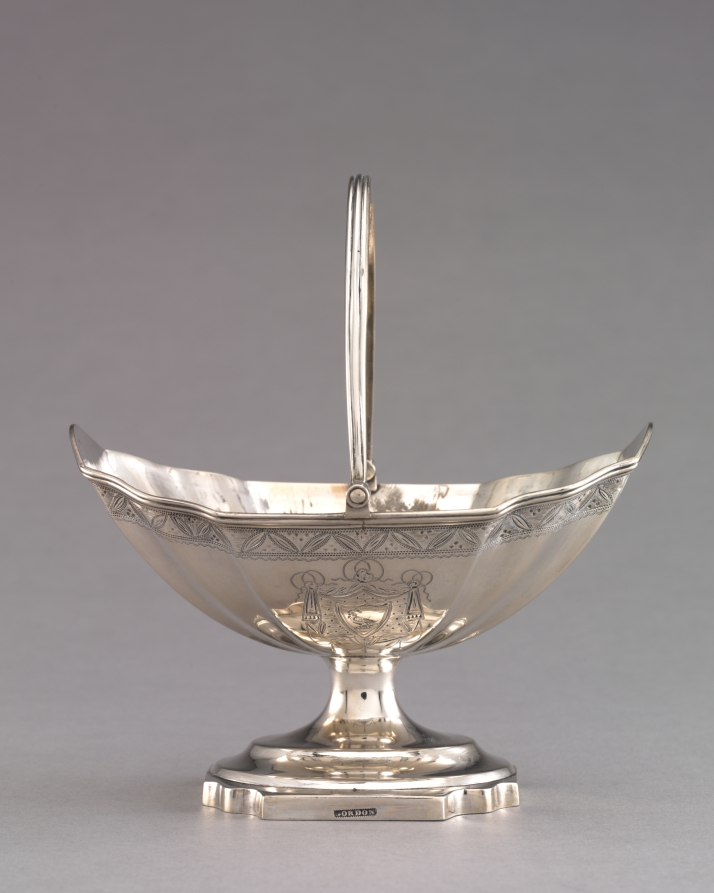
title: Sugar Basket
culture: America, New York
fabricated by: or Andrew Gordon (American)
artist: James Gordon (American)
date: c. 1796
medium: silver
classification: Silver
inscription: engraved in bright-cut script within a shield surrounded by mantlings on one side, and a bird with a branch within a corresponding shield on opposite side: JSD.